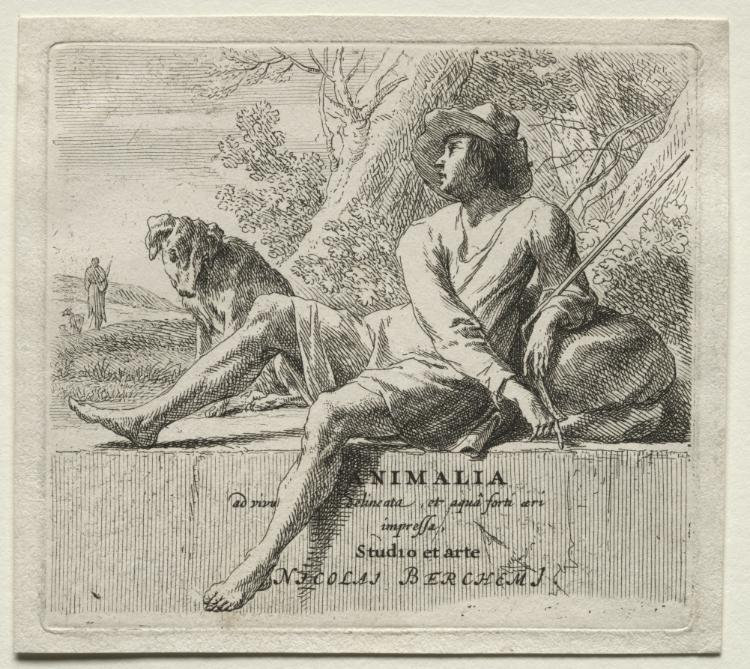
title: Animalia: Frontispiece, Shepherd and Dog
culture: Netherlands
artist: Nicolaes Berchem (Dutch, 1620–1683)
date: 1635–83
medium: etching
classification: Print